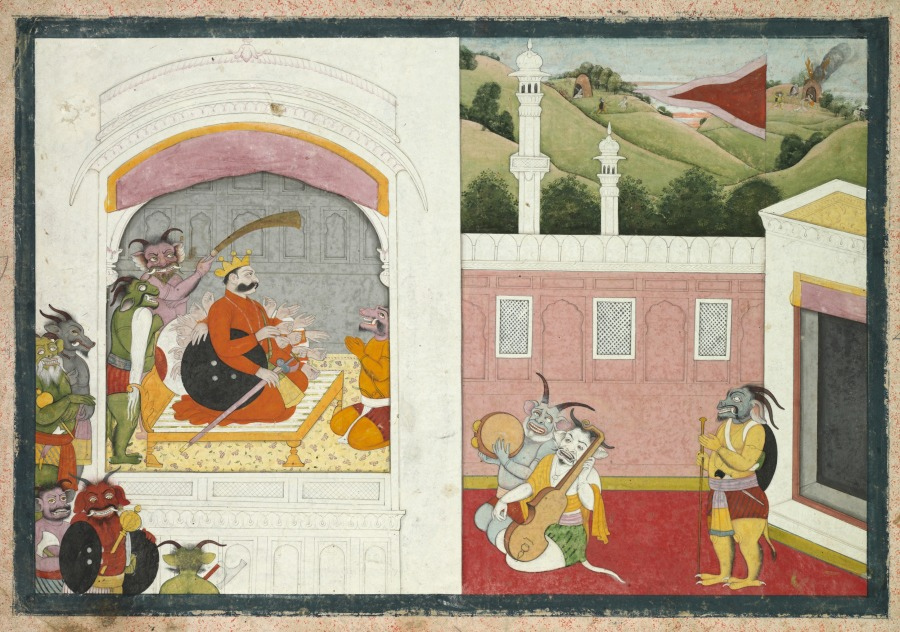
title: King Bana in his court, from an Usha-Aniruddha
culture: Northern India, Pahari kingdoms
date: c. 1760–70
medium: Gum tempera and ink on paper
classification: Painting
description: This portrait of a demon king depicts him listening to the report of one of his ministers. He may be hearing the news that his daughter Usha has been secretly receiving Krishna’s grandson Aniruddha in her bedchamber. The artist has depicted Bana with his 20 arms emerging like tentacles from his body. The members of his multicolored demon court are imaginatively rendered combinations of beasts and humans. In the background, demons harass holy men by burning their huts and chasing them away from their settlements.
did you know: Clara Taplin Rankin, the donor of this painting, was a trustee of the CMA as well as the Musical Arts Association and the Cleveland Institute of Music.